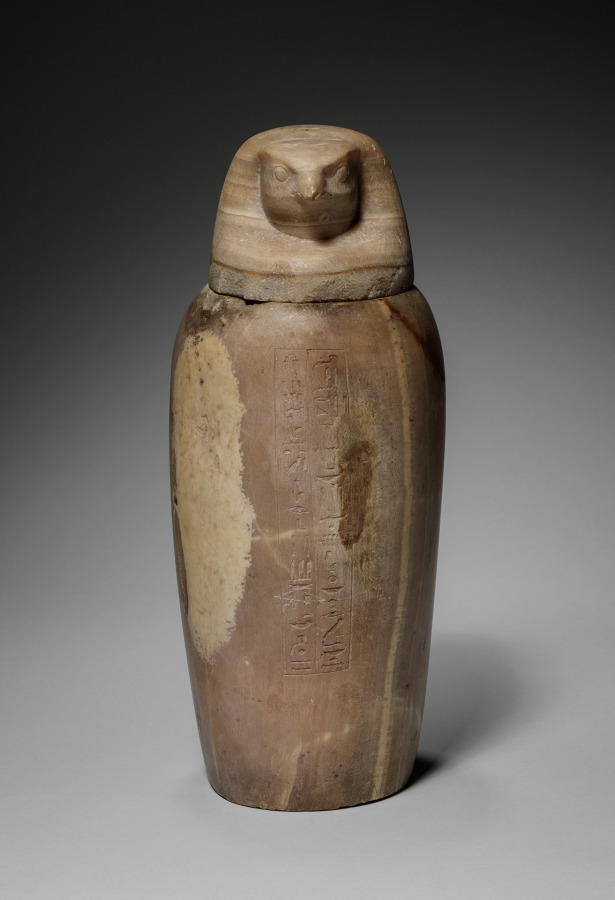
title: Canopic Jar with Falcon's Head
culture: Egypt, Late period (715–332 BCE), Dynasty 26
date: 664–525 BCE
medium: travertine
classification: Funerary Equipment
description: In the process of mummification, the liver, lungs, stomach, and intestines were removed, separately embalmed, and stored in specialized jars known as canopic jars (after a sailor in Greek mythology, who died at the town of Canopus in the Nile Delta and was worshipped there in the form of a human-headed jar). Each organ was identified with one of four funerary deities collectively known as the Sons of Horus: the liver with Imsety (man's head), the lungs with Hapy (baboon's head), the stomach with Duamutef (jackal's head), and the intestines with Qebehsenuef (falcon's head). It was their duty to protect the deceased and restore to him his body parts in the hereafter.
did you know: The falcon-headed deity Qebehsenuef protected the contents of this canopic jar. It contained the remains of the deceased's intestines, which were kept safe for the afterlife.